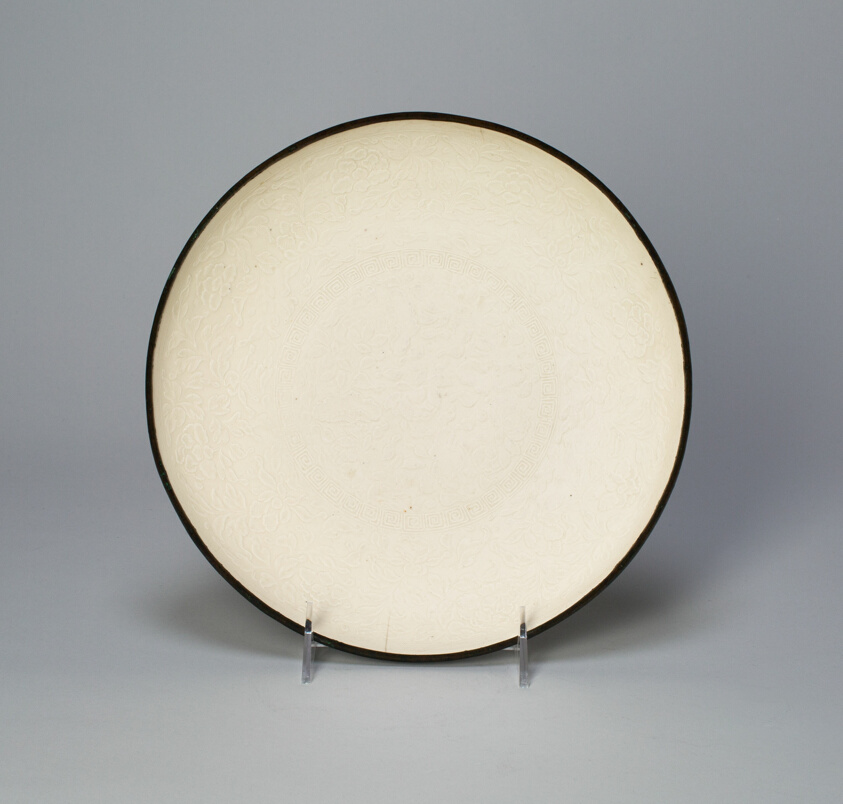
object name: Vessel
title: Dish with with Lotus, Saggataria, Mallow, and Peony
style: Chinese (culture or style)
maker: China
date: Northern Song dynasty (960–1127)/Jin dynasty (1115–1234), early 12th century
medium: Ding ware; porcelain with underglaze mold-impressed decoration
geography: China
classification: dish (vessel); porcelain; asian art; ceramics; vessel